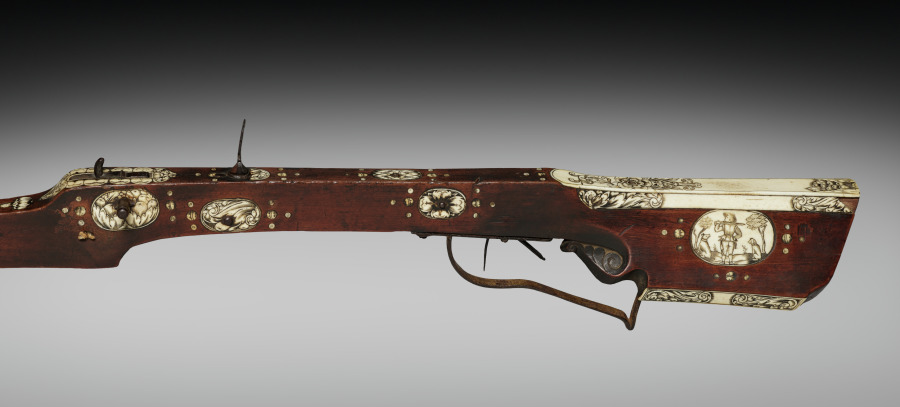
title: Pellet Crossbow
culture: Germany (?)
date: 1600s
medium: wood, inlaid with stag horn; flax cord; steel with traces of paint and gilding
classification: Arms and Armor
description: This ornate pellet crossbow is designed to fire molded clay pellets or small rocks, giving it the name stonebow. The bow is hand drawn and used for hunting small game.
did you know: This is a custom-made crossbow combining popular Italian and German designs of the 1600s.